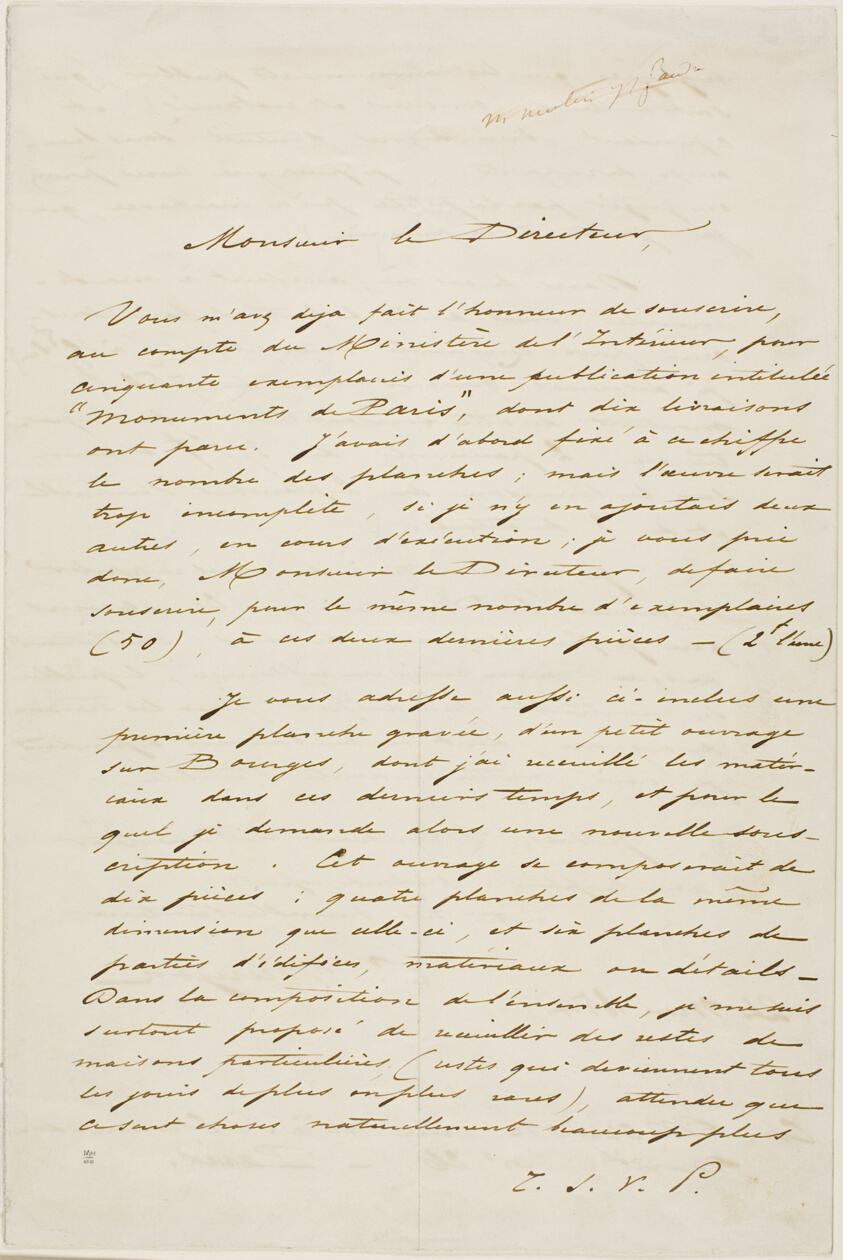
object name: Drawing and Watercolor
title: Charles Meryon Autographed Letter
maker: Charles Meryon (French, 1821-1868)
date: March 24, 1854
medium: Brown ink on ivory wove paper, folded in half to create four pages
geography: France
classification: pen and ink drawings; letter; prints and drawing; paper